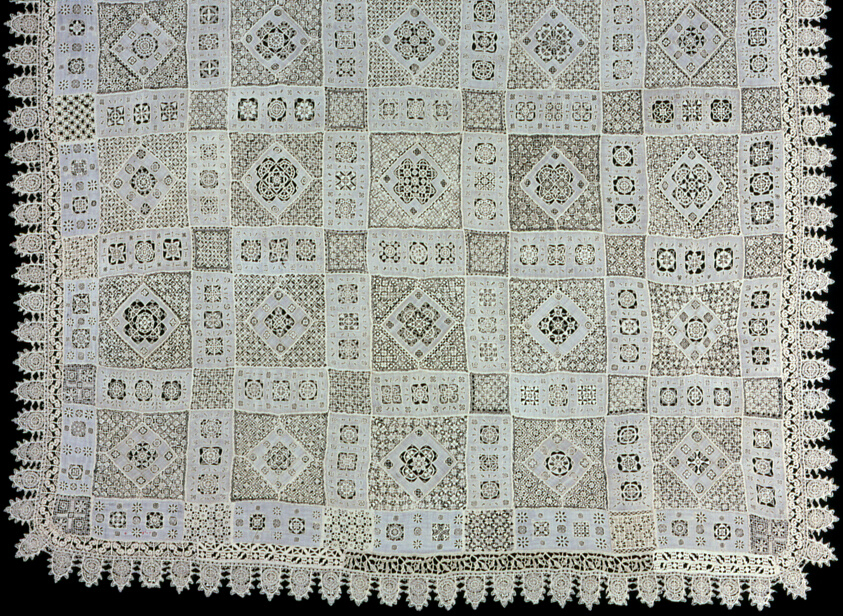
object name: Textile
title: Cover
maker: Italy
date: 1601/25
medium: Squares and rectangles of: linen, plain weave; cut and drawn work embroidered in back, hem, overcast, square open work stitches and needle lace fillings; and squares of linen, knotted square netting embroidered in cloth, darning, and interlocking lace stitches; darned and overcast bars, darned points and squares, and darned and woven wheels; edged with linen, bobbin lace; linen, plain weave cut work with needle lace fillings, and points of linen, needle lace worked on a cut and drawn thread grid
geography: Italy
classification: textile; lace - mixed